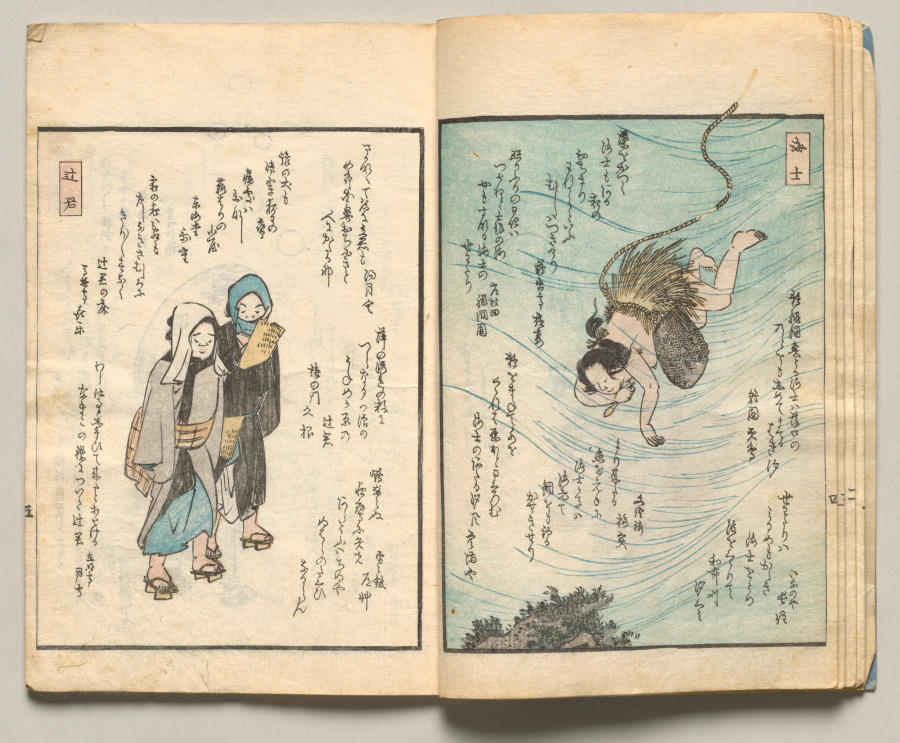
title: Spread Five from Volume Three of People of Japan in Light Verse (Kyōka)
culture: Japan, Edo period (1615–1868)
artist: Utagawa Hiroshige (Japanese, 1797–1858)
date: 1857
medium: Woodblock-printed book; ink and color on paper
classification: Bound Volume